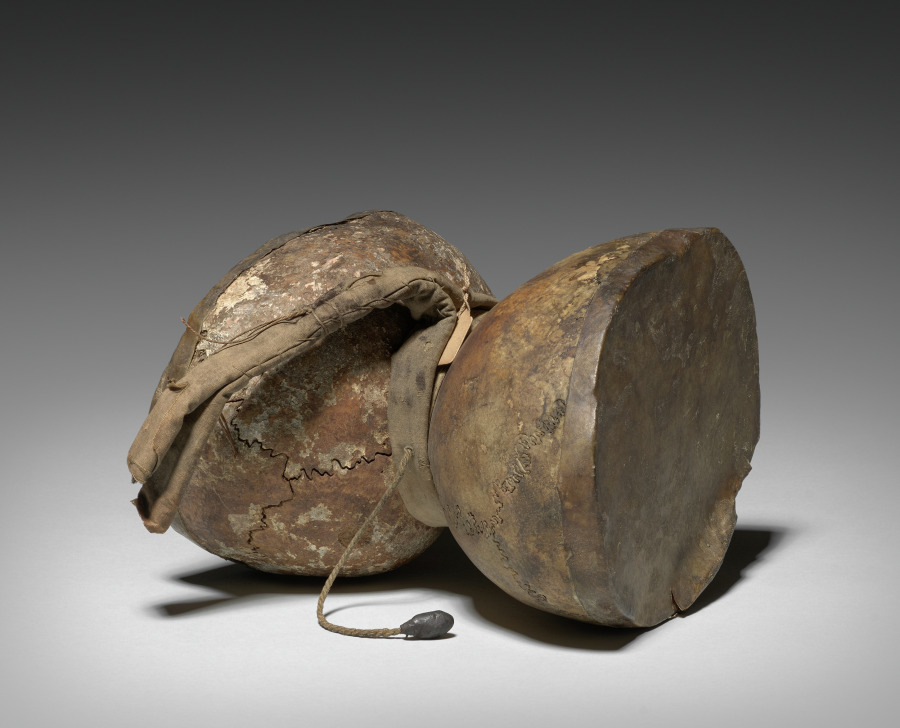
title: Ritual Drum (damaru)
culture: Tibet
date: c. 1800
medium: skull bone, cloth, hemp fiber, leather, and skin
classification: Musical Instrument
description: Damaru drums are made from the tops of two skulls joined in the center and sounded by rapidly turning it side to side so the ends of the cords fly up to sound against the stretched skin. In Hindu and Buddhist rituals, the rhythm of the damaru references the ongoing, relentless beat of time. The material of bone reminds practitioners of the inevitability of death in the course of time.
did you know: Dancing Shiva, in his form as Nataraja, holds a damaru in one hand.